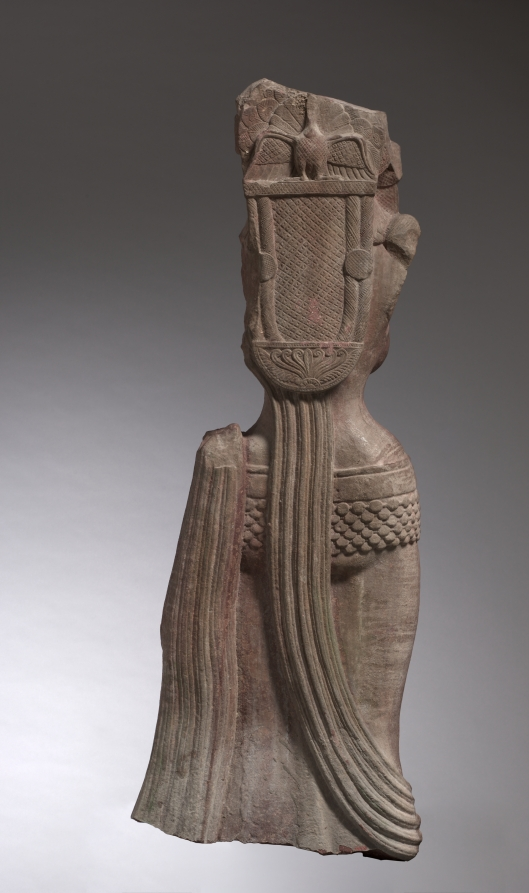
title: Nature Divinity (Yakshi)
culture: India, Mathura, Kshatrapa period (c. 20 BCE–114 CE)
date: c. 75 CE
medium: mottled red sandstone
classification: Sculpture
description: This powerful figure personifies the ideal of the young mother in the form of a nature goddess associated with birth and nourishment. Her iconic stance with the weight equally distributed on both feet indicates that this statue was an object of worship. Her extraordinary headdress, well preserved in the back, and full complement of jewels and ornaments, point to the idea of wealth, which leads to prosperity.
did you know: The prominence of the peacock (enemy of serpents) on the back of her headdress suggests she has the power to protect against snakebite.